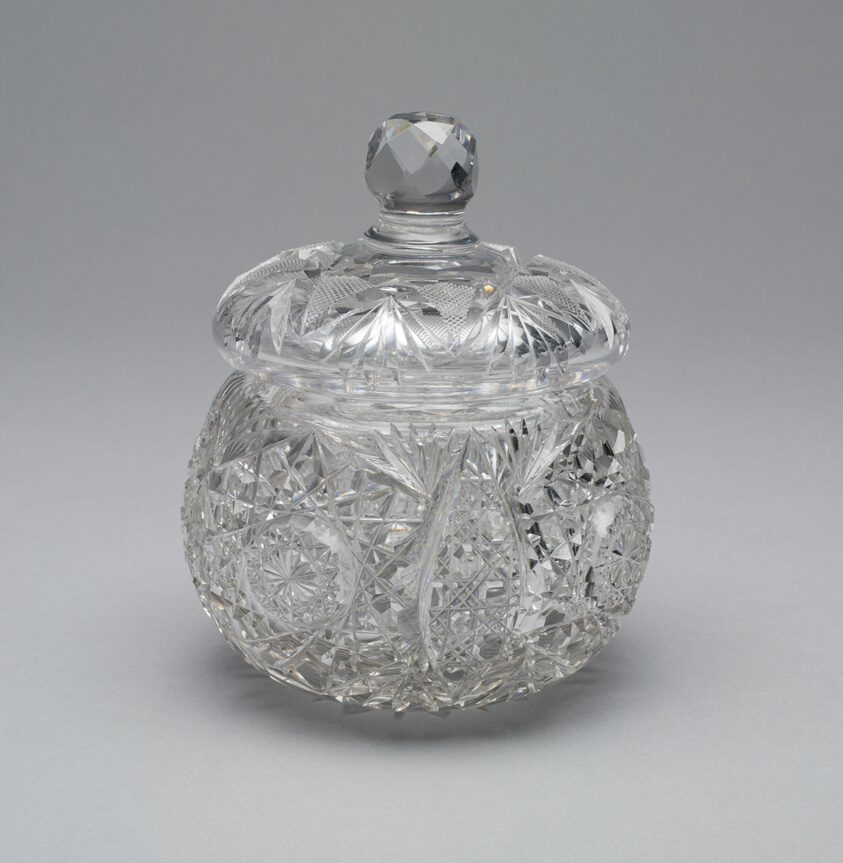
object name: Glass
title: Covered jar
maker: Artist unknown (American, 19th–20th century)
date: c. 1902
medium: Cut glass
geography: United States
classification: vessel; glass; american decorative arts; american arts; decorative arts